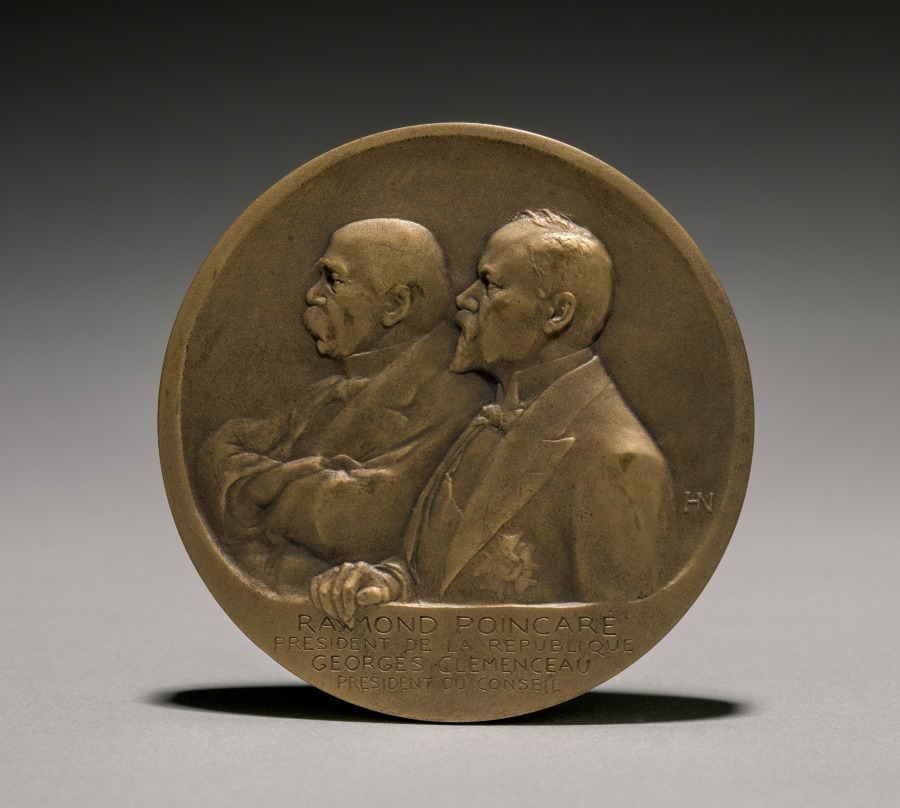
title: Poincare-Clemenceau Medal (obverse)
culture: France, 20th century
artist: Henri Nocq (French, 1868–1942)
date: 1900s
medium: bronze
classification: Metalwork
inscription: "Raymond Poincare President de la Republique, Georges Clemenceau President du Conceil."